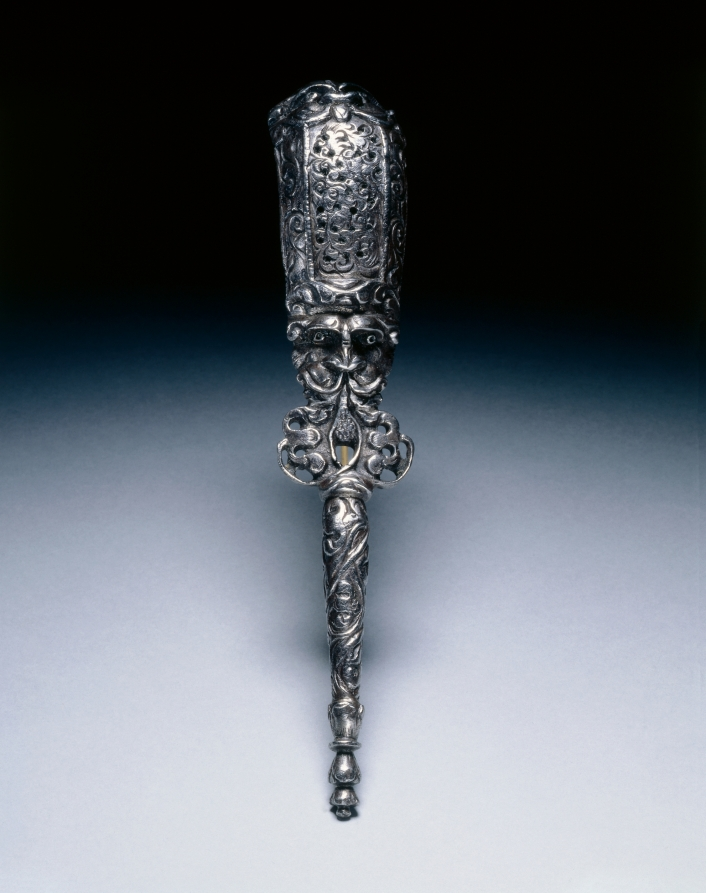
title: Trigger Guard for a Pistol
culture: Italy, Brescia (?), late 17th Century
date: c. 1680–1700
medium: chiseled steel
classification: Arms and Armor